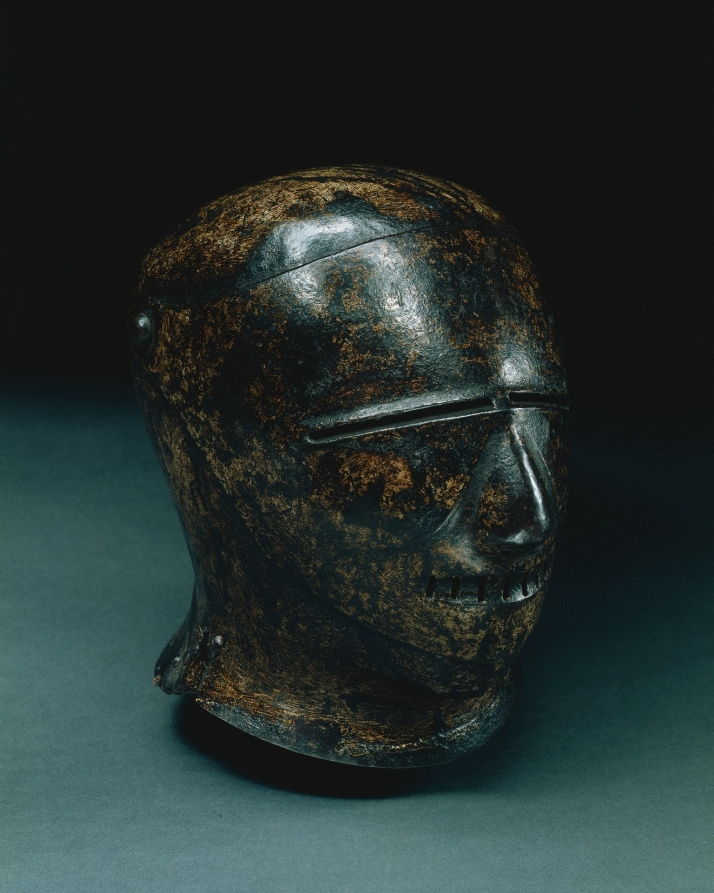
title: Closed Sallet with Grotesque Face (Schembart visor)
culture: Germany, Nuremberg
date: c. 1500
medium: painted steel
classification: Arms and Armor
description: A small number of similar painted helmets survive today. All appear to date to the early 1500s. The visors of these helmets are usually in the form of fiercely grimacing human or animal faces, known as Schembart visors after the masked revelers in the Schembartlaufen, the medieval Shrovetide parades. The city of Nuremberg was particularly famous for its Shrovetide parades that were often held in conjunction with a tournament in which the younger members of the city's patrician families, presumably sporting such helmets, participated.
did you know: Masked revelers at the Schembartlaufen of Nuremberg enjoyed food, drink, music, and dancing until coming to an abrupt end in 1539 due to the objections of a preacher.